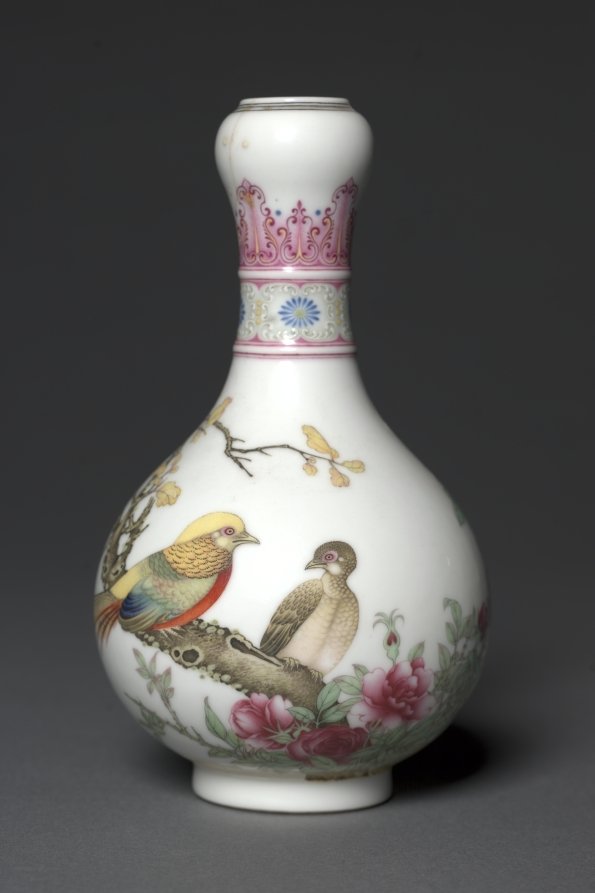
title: Vase with Golden Pheasants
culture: China, Jiangxi province, Jingdezhen kilns, Qing dynasty (1644-1911), Qianlong mark and period (1736-95)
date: 1736–95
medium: porcelain painted in polychrome enamels over transparent glaze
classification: Ceramic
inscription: 乾隆年製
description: The flower-and-bird painting in this vase was intricately executed in colored enamels (falangcai), with careful modeling, shading, and blending of colors reflecting European influences through missionary-artists at the Qing court. The Jesuit artist Giuseppe Castiglione (1688–1766), in particular, exerted tremendous impact at the Qianlong academy.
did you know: Refined porcelains produced in Jingdezhen kilns were sent to Beijing palace workshops to be decorated in falangcai technique under direct imperial supervision.